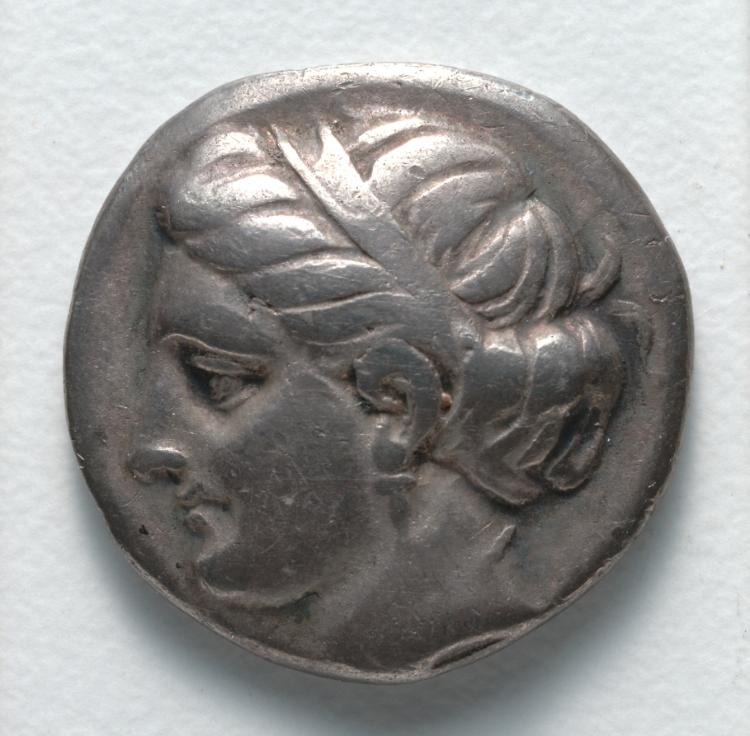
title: Drachm: Female Head (obverse)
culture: Greek, minted at Chalkis (Euboia)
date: 337–308 BCE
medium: silver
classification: Coins